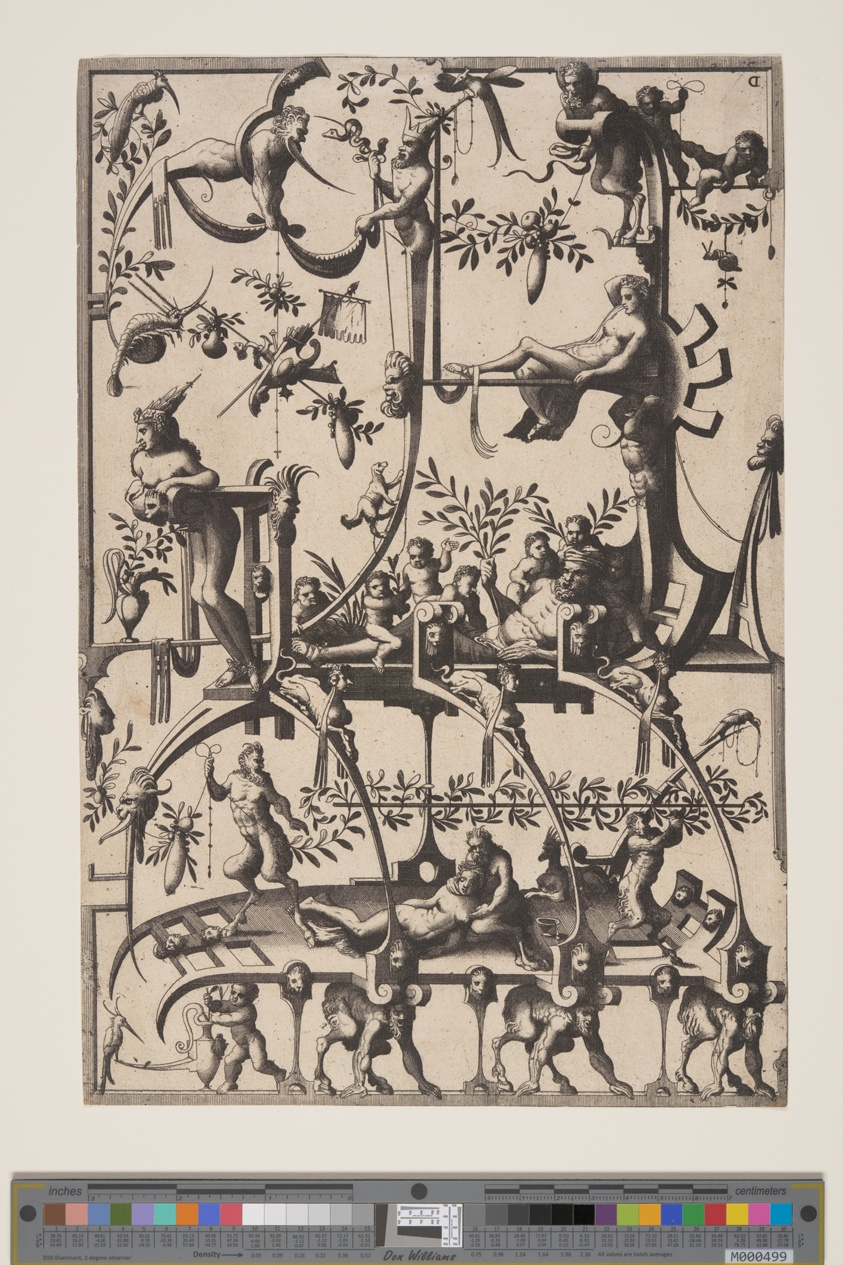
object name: Print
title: Grotesque Ornament and Tomb Design, from Veelderleij veranderinghe van grotissen...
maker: Johannes van Doetecum (Netherlandish, 1528/32–1605) and Lucas van Doetecum (Dutch, died before 1584); after Cornelis Floris (Flemish, 1514-1575)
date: 1556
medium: Etching on ivory laid paper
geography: Netherlands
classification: print; paper; prints and drawing; etching